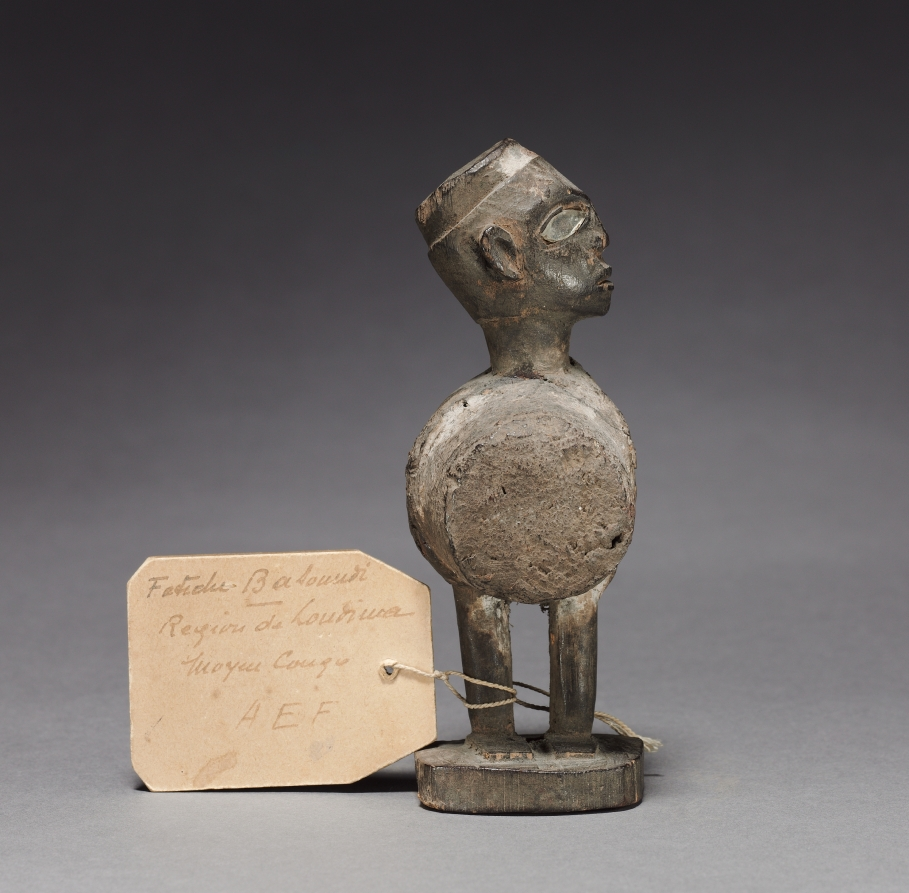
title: Power figure (nkisi)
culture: Africa, Central Africa, Republic of the Congo, Kongo-style maker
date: late 1800s-early 1900s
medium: Wood, organic materials (including resin), and metalized glass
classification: Sculpture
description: One of seven anthropomorphic figurines, these minkisi contained medicines in which an ancestral spirit was believed to reside. The medicines served a metaphorical rather than literal purpose in the resolution of conflicts among Kongo people. This figure contained white- and red-colored medicine loads on its belly and back. Its pose may refer to the nkisi’s capacity to see more than others.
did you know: The nduda minkisi were loaded with gunpowder and/or medicine to protect their owners and to shoot “witches” and other enemies.